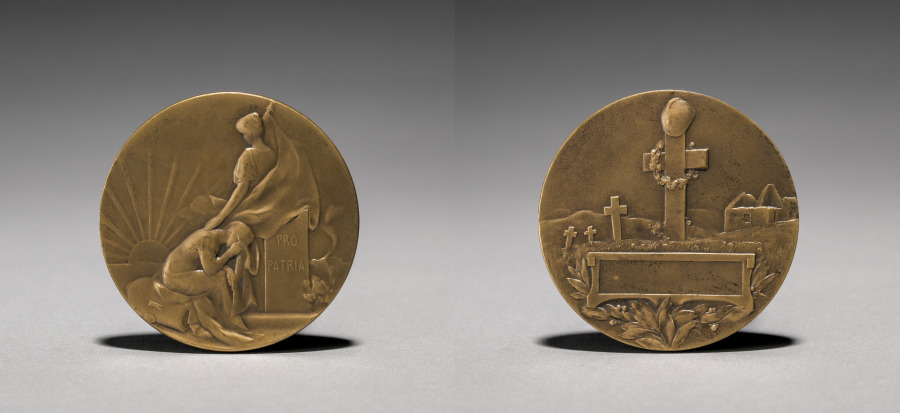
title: Medallion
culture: France, 20th century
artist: Edouard Fraisse (French, 1880–1945)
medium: bronze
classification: Metalwork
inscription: "Pro Patria" (for the fatherland); signed: "E. Fraisse."